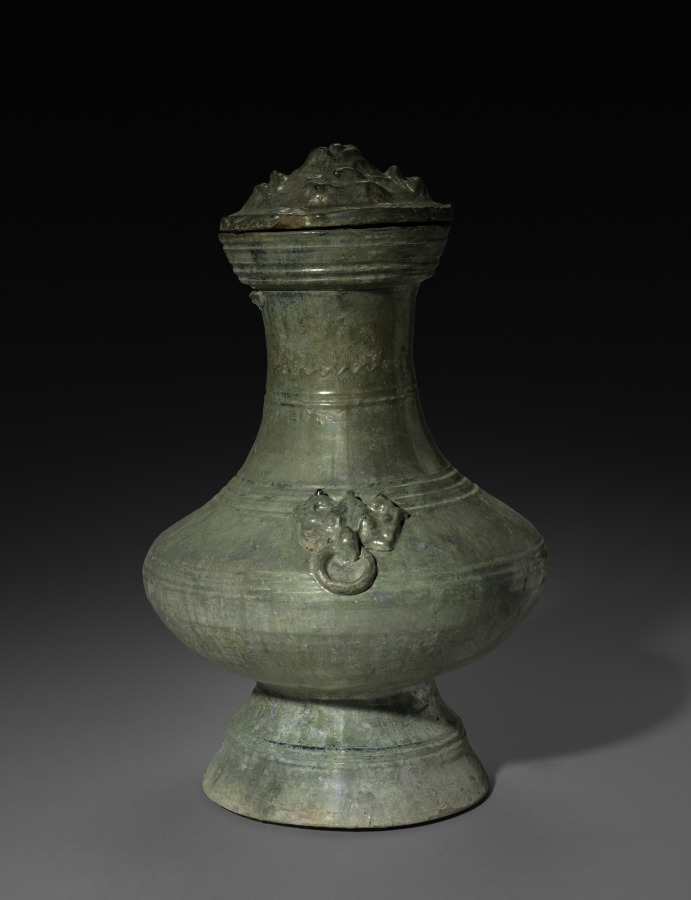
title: Covered Jar (Hu)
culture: China, Eastern Han dynasty (25–220 CE)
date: 25–220 CE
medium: earthenware with lead glaze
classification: Ceramic